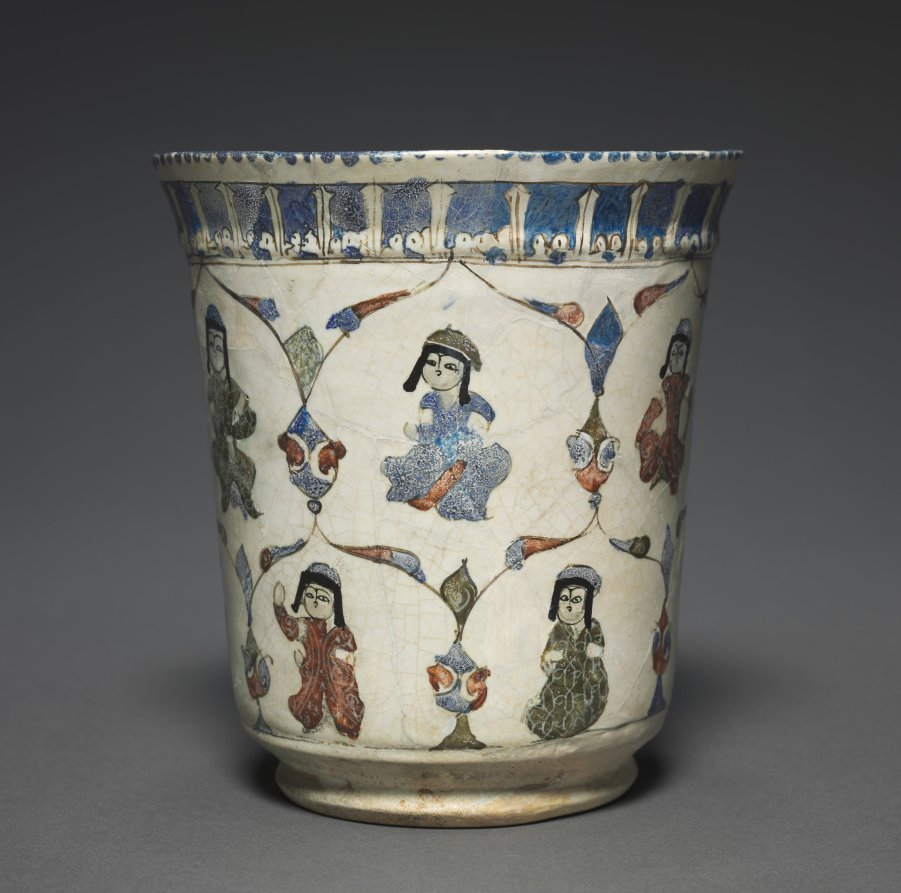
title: Mina'i Beaker with Seated Princes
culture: Iran, Kashan, Seljuq period of Iran (1037–1194)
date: 1180–1220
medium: Fritware with overglaze design, mina’i ware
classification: Ceramic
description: Mina’i ware takes its name from the Persian word for enamel. It was a luxurious type of pottery and used enamel painting to create true polychrome ceramic for the first time. Mina’i ware frequently combines blues, greens, and purples with sharp black and red executed with precise control. Figural scenes are quite common for these vessels and often recall book illustrations including rows of seated court members, sometimes flanking an enthroned ruler, and princely scenes of hunting or falconry.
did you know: A band of Kufic runs around the outside of the rim and another one is around the inside of the rim.